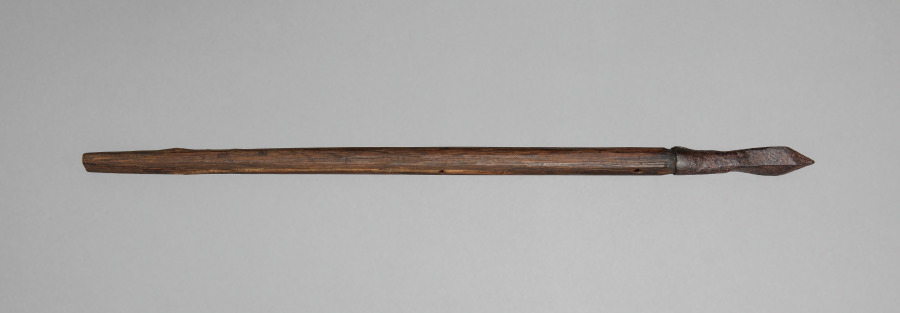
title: Crossbow Bolt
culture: Germany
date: 1500s-1600s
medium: wood, leather, steel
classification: Arms and Armor